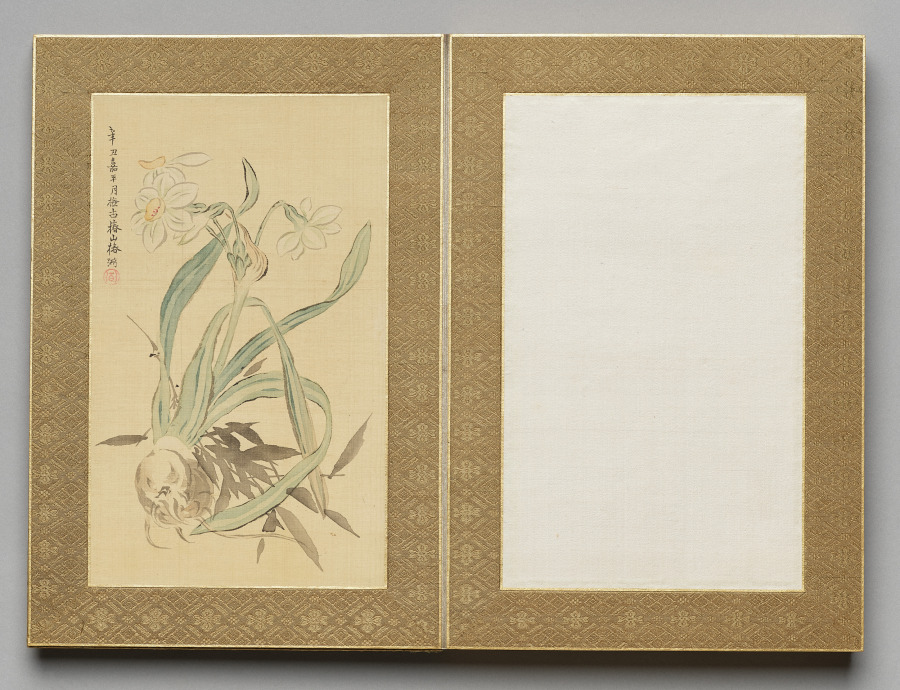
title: Painting from Flowers and Grasses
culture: Japan, Edo period (1615–1868)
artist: Tsubaki Chinzan (Japanese, 1801–1854)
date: 1841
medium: album; ink and color on silk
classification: Painting